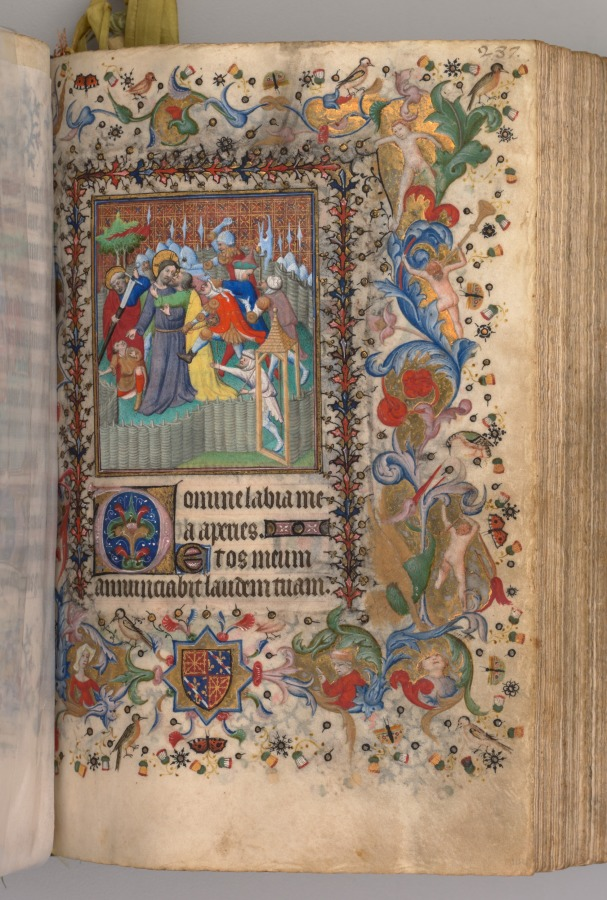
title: Hours of Charles the Noble, King of Navarre (1361-1425): fol. 144r, Betrayal of Christ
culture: France, Paris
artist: Master of the Brussels Initials and Associates (French)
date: c. 1405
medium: ink, tempera, and gold on vellum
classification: Bound Volume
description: This precious volume was obviously highly prized by its owner, the French-born King of Navarre, who had his coat of arms painted on no less than twenty folios. Rather than directly commissioning this manuscript from a specific workshop, it seems that Charles the Noble acquired his book of hours -- perhaps ready-made for the luxury market -- while on a trip to Paris in 1404-05. A collaborative effort, six painting styles are evidenced within the pages of this codex, those of two Italians, two Frenchmen, and two Netherlanders. The painter who was responsible for the planning and decoration of the book, and who produced seventeen of the large miniatures, was a Bolognese artist known as the Master of the Brussels Initials. His principal assistant, responsible for most of the borders, was a Florentine who signed his name "Zecho" da Firenze on folio 208 verso.